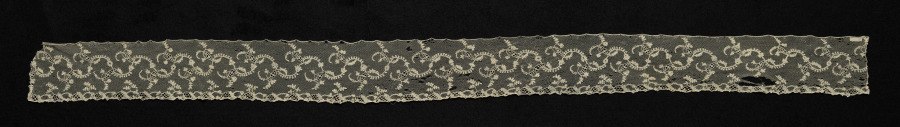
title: Lace Edging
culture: Belgium, Brussels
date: 1780s–90s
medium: Linen: bobbin lace (appliqué)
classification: Lace